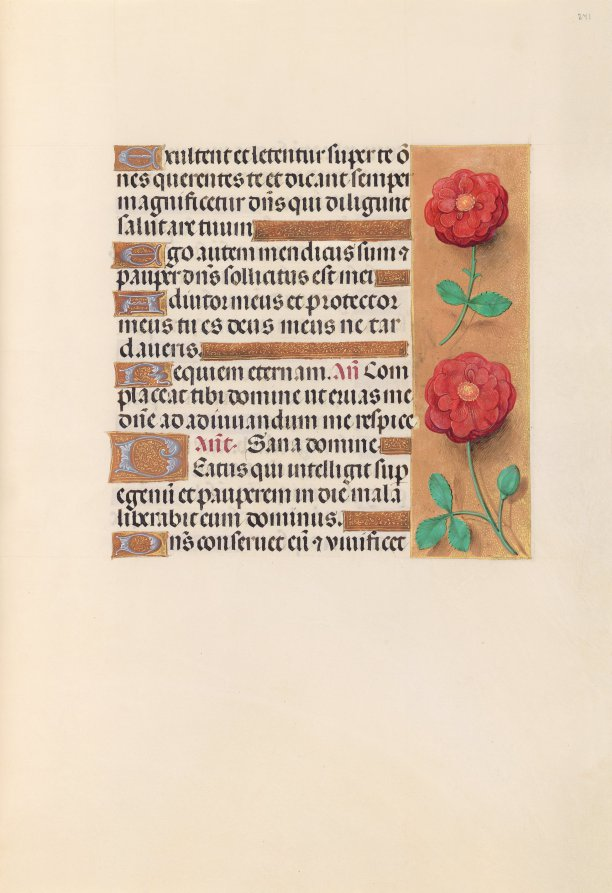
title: Hours of Queen Isabella the Catholic, Queen of Spain: Fol. 241r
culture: Flanders, Ghent and Bruges, late 15th century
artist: Master of the First Prayerbook of Maximillian (Flemish, c. 1444–1519)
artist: and Associates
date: c. 1500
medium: ink, tempera, and gold on vellum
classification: Bound Volume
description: This manuscript was illuminated by a circle of at least five highly organized manuscript painters active in the Flemish cities of Ghent and Bruges. The principal illuminator was Alexander Bening, who painted the majority of the book's miniatures. Manuscripts produced by this circle of artists are renowned for the decoration of their borders, which typically feature a rich variety of realistically-painted flowers, birds, and butterflies. This prayer book, called a book of hours, was intended not for a cleric, but for the private devotions of a lay person-in this case, Isabella the Catholic, Queen of Spain (1451-1504). Isabella's coat of arms embellishes the book's frontispiece. It is unlikely that the book was commissioned by the Queen herself; rather, she probably received it as a diplomatic gift from someone courting her patronage, perhaps Cardinal Francisco Jimenez de Cisneros. A Franciscan friar, Jimenez was dependent upon Isabella for his advancement, first to the post of Queen's confessor in 1492, and then to Archbishop of Toledo in 1495.